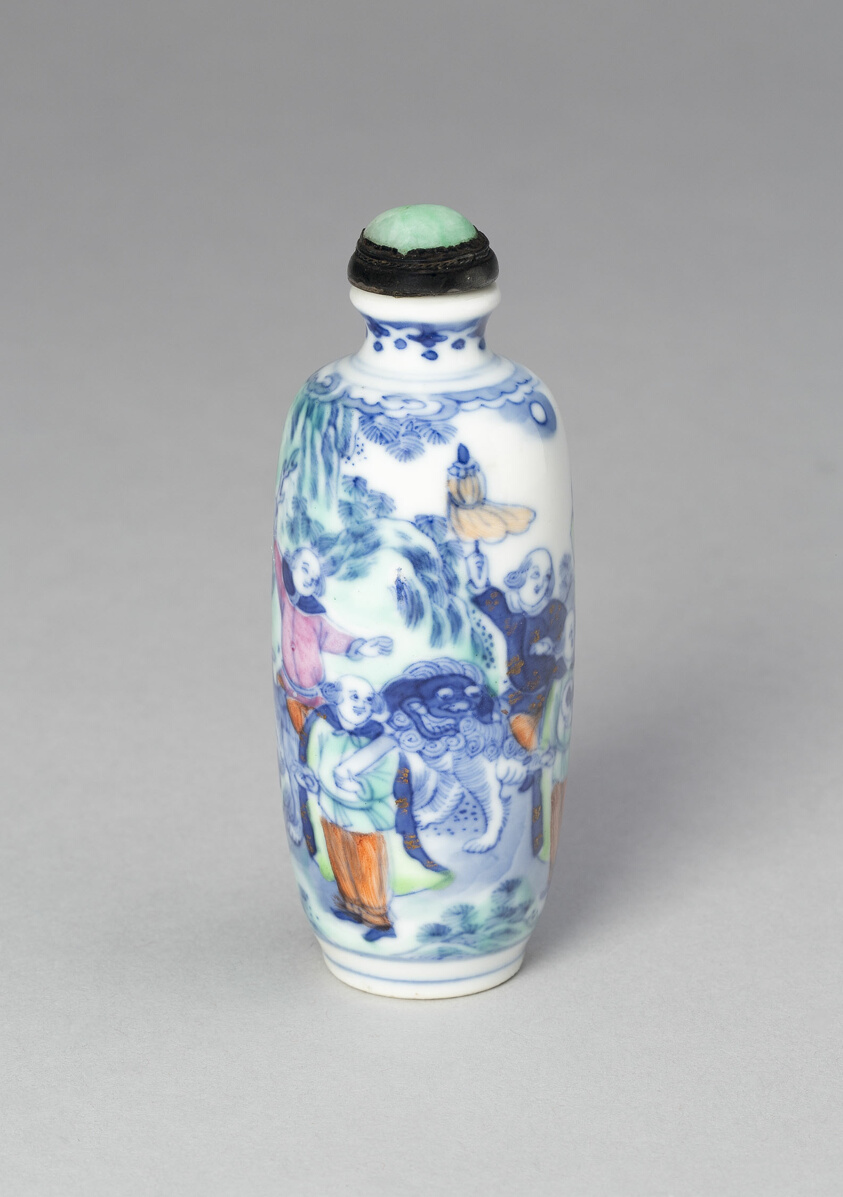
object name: Vessel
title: Snuff Bottle with Eight Foreign Figures Bearing Tribute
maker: China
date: Qing dynasty (1644–1911), Xianfeng reign mark and period (1851–1861)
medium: Porcelain painted in underglaze cobalt blue and overglaze enamels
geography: China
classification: snuff bottle; porcelain; ceramics; asian art; vessel